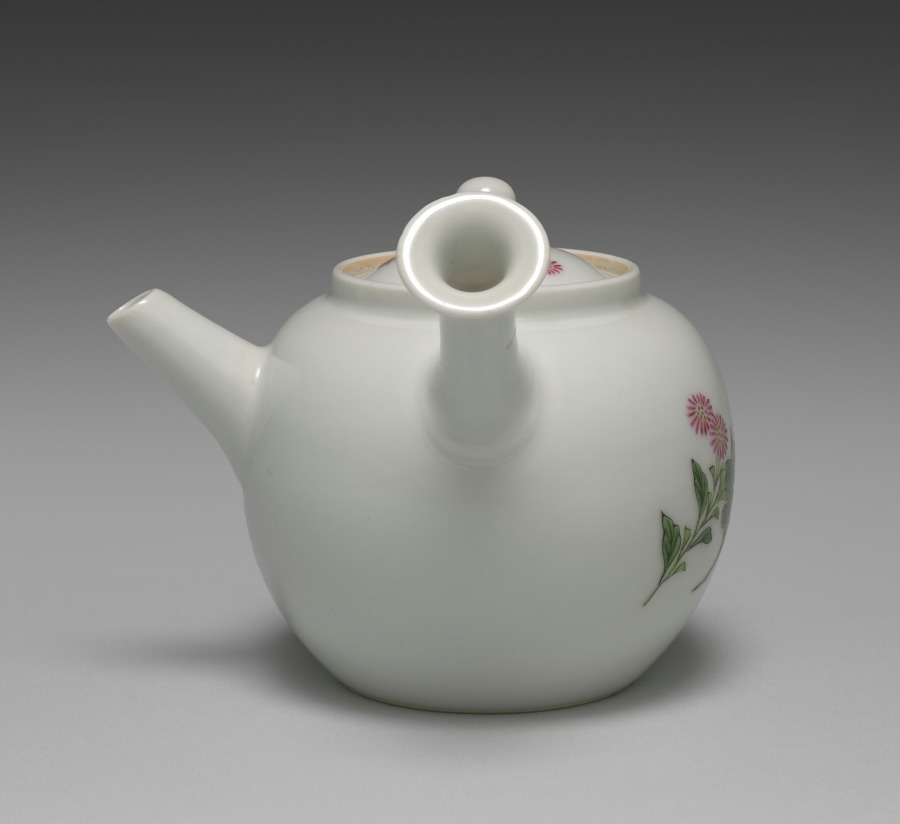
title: Teapot with Chrysanthemums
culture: Japan, Meiji period (1868–1912)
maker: Seifū Yohei III (Japanese, 1851–1914)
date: 1912–14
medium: Porcelian with overglaze enamel and gold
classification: Ceramic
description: This teapot with recessed lid has a bold, realistic design of pale yellow and white chrysanthemums rendered in overglaze color enamels and dotted gold centers. Black contour lines define the yellow and white flowers and their green stems and leaves. Small pink and purple chrysanthemums are rendered as simple motifs, their shapes defined in contrast to the white ground of the pot.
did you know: This side-handled teapot is designed for brewing and serving sencha.